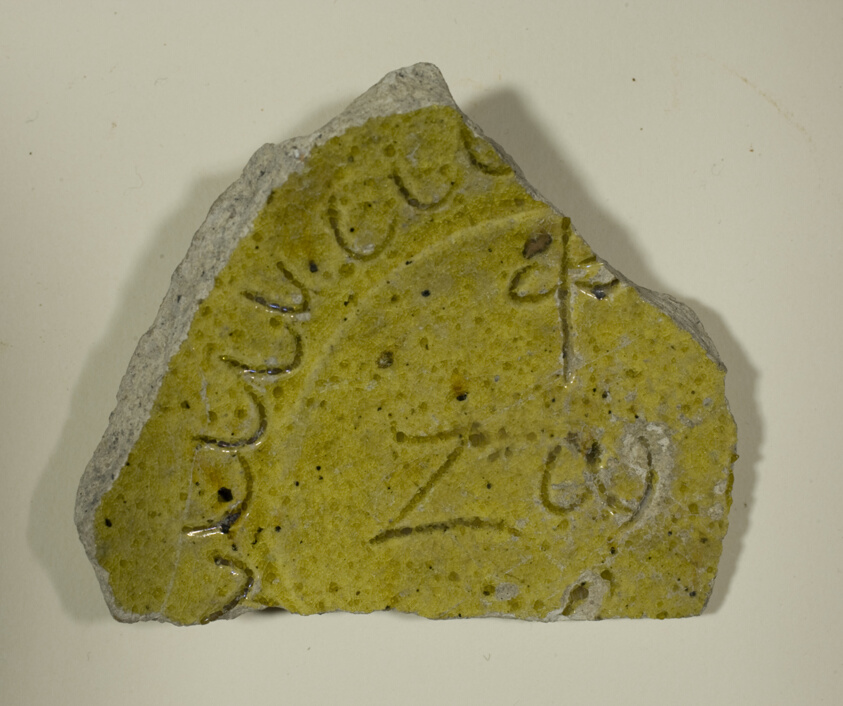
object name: Decorative Arts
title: Fragment of a Bowl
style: byzantine, european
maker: Byzantine (Asia Minor, Constantinople or Greece, Thessaloniki)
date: 13th-14th century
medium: Ceramic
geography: Istanbul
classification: fragment; ceramics; vessel; bowl; asian art; decorative arts